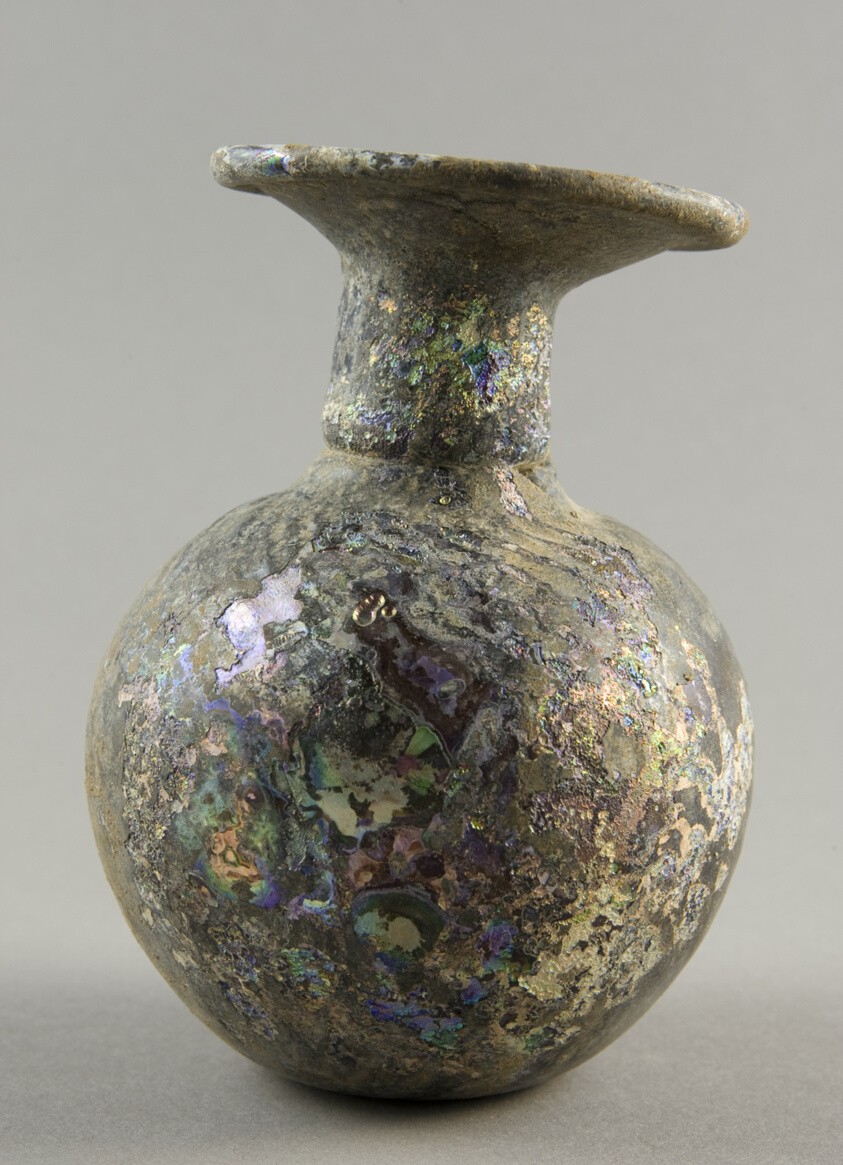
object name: Vessel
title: Jar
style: syrian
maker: Roman; Syria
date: 2nd-3rd century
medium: Glass, blown technique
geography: Syria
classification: vessel; glass; ancient art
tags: vessels, containers